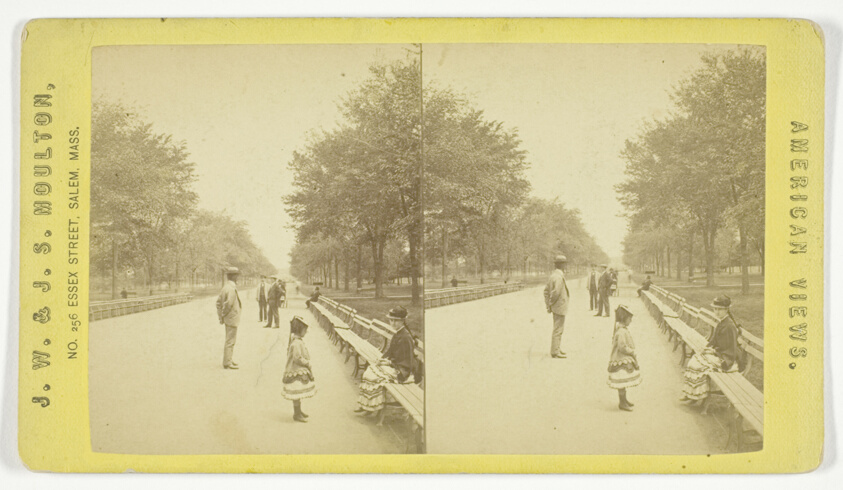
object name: Photograph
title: The Mall, No. 215 from the series "New York City & Vicinity"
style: 19th century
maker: J.W. & J.S. Moulton (Americans, active 1873-1881)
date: 1873/81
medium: Albumen print, stereo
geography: Salem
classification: photography; photograph